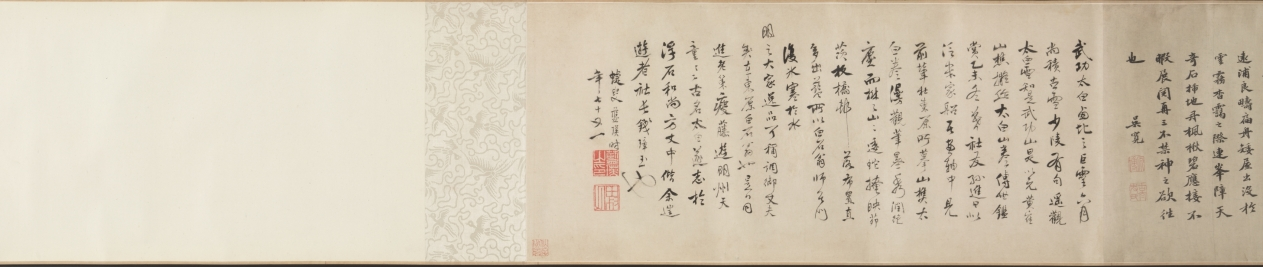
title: Mt. Taibo in the Style of Wang Meng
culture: China, Ming dynasty (1368–1644)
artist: Du Qiong (Chinese, 1396–1474)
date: 1442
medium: handscroll; ink and light color on paper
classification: Painting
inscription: Artist's inscription, signature, and 11 seals: [1 seal] Tung-yüan chai. Huang-ho-shan-ch'iao [Wang Meng] painted a painted called T'ai-po Mountain. Its brushwork is superior and admirable, which is very close to Yu-ch'en [Wang Wei, 699-759]. The cleverness of its composition, the maple groves and rustic temples, the inaccessible ravines and autumnal plateaus, the periolous peaks and strange rocks, etc., all seem to be so natural. The paper is only a little over eight feet, but the landscape has the range of a thousand miles. Once you open and note the contents, it is as if one were roaming among the mountain peaks enveloped in mist and clouds, and forgot the dusty world. When I first saw this, I was so mixed with excitement and joy that I could not take my hands off the painting. So I put it on the table, and tried my best to imitate it, forgetting sleeping and eating for about three months before it was completed. Although I do not dare to tread in the footsteps of Huang-ho shan ch'iao, I took great pains to capture his spirit in composition and colors. I do not know whether it would pass the judgment of the experts. On the fifteenth day of the fifth month, the seventh year of the Cheng-t'ung year [1442], inscribed by Tung-yüan, Tu Chiung. [2 seals] Yung-chia; Ching-chieh ming-men. [8 seals on painting] Tung-yüan chai; Ching-chieh ming-men; Yung-chia; Tu Ch'iung yin; Tung-yüan (repeated 5 times). trans. WKH/LYSL 3 colophons and 7 additional seals: 1 colophon and 2 seals of Chou Ting (1401-1487); 1 colophon and 2 seals of Wu K'uan (1435-1504); 1 colophon, dated 1655, and 2 seals of Lan Ying (1585-after 1664).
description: When a Chinese painter "imitated" a painting by a past master, the intention was never to produce an exact copy. Du Qiong, the Ming painter from Suzhou, is a case in point. The painting style of this handscroll is actually closer to that of Huang Gongwang (1269–1354) than to the style of Wang Meng (about 1301–1385). Both masters were active during the previous dynasty and are among the so-called Four Great Masters of the Yuan dynasty (1279–1368). In this painting, the interplay of styles, including Du Qiong's own, contribute to an inner dimension that is more than visual. Mt. Taibo is located in the province of Zhejiang and is known for its scenic beauty. In this scroll, however, it is not depicted literally. The image is an ideal representation of mountains in southeastern China.